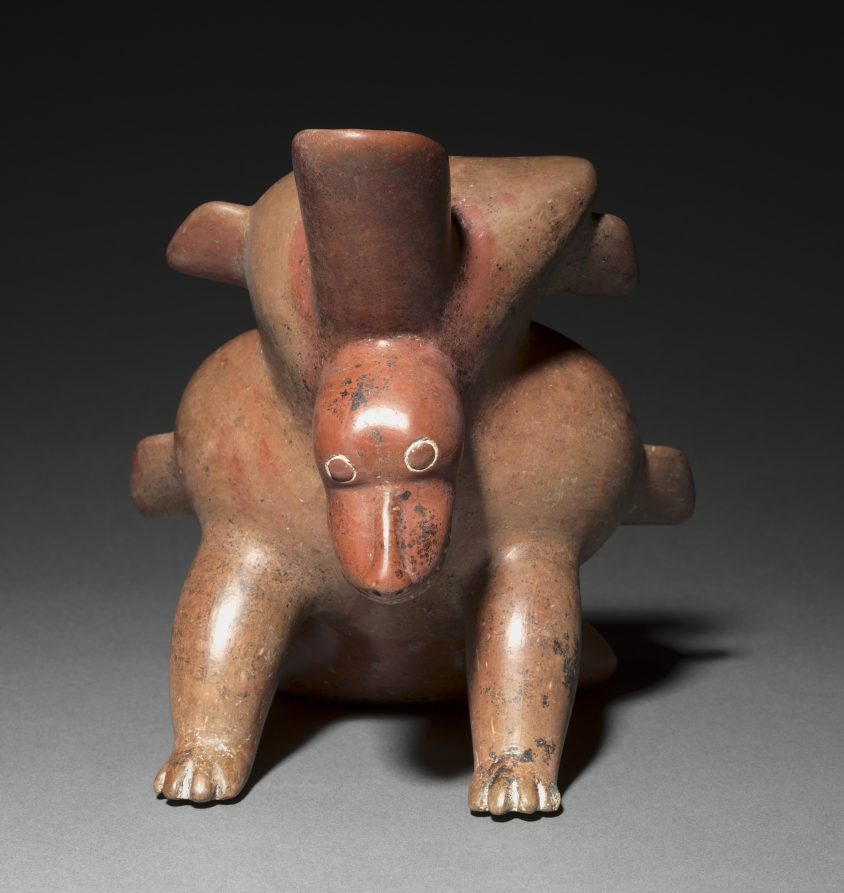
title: Recliner-shaped Vessel (Reclinatorio)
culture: West Mexico, Colima state, Comala style, Formative period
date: 200 BCE–300 CE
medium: ceramic and slip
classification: Ceramic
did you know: This vessel represents a major type of Colima pottery.